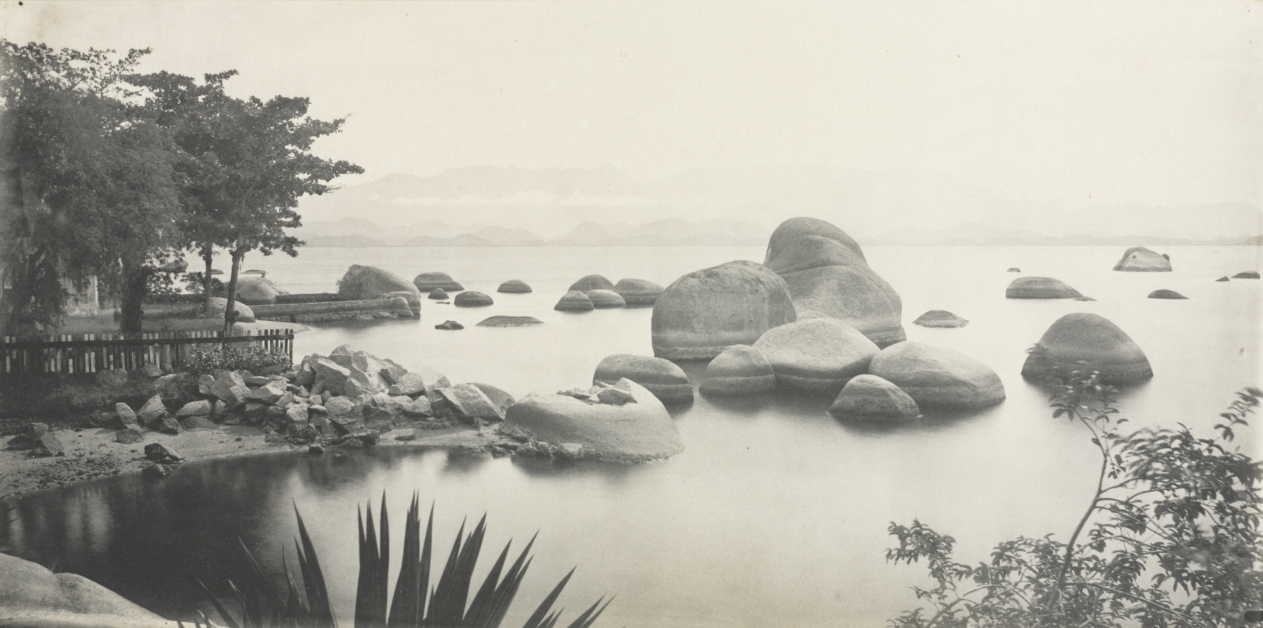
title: Paquetá, Rio de Janeiro, Brazil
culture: Brazil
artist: attributed to Marc Ferrez (Brazilian, 1843–1923)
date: c. 1890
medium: platinum print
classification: Photograph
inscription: written in ink on recto: "N=19"; printed in pencil on verso: "K1116/ bay todos os Santos Paqueta (Brazil) Marc Ferrez?/ of Christies' SoKen lot 96